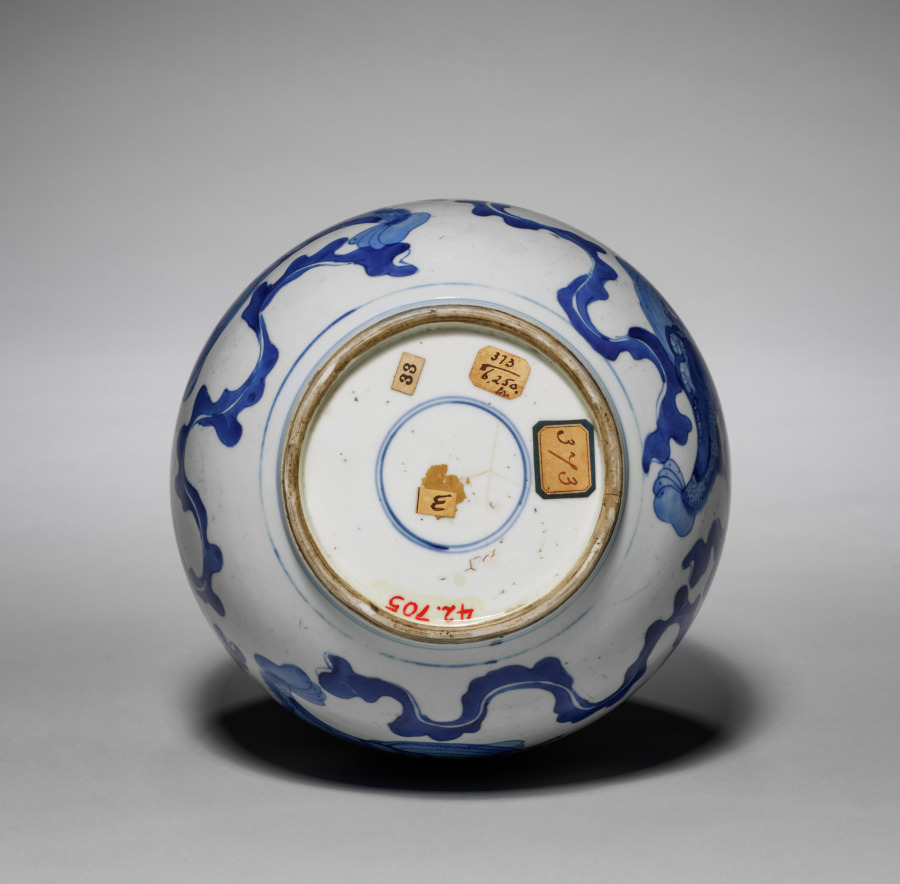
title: Bottle Vase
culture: China, Qing dynasty (1644-1911), Kangxi reign (1661-1722)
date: 1662–1722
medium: porcelain with underglaze blue decoration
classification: Ceramic